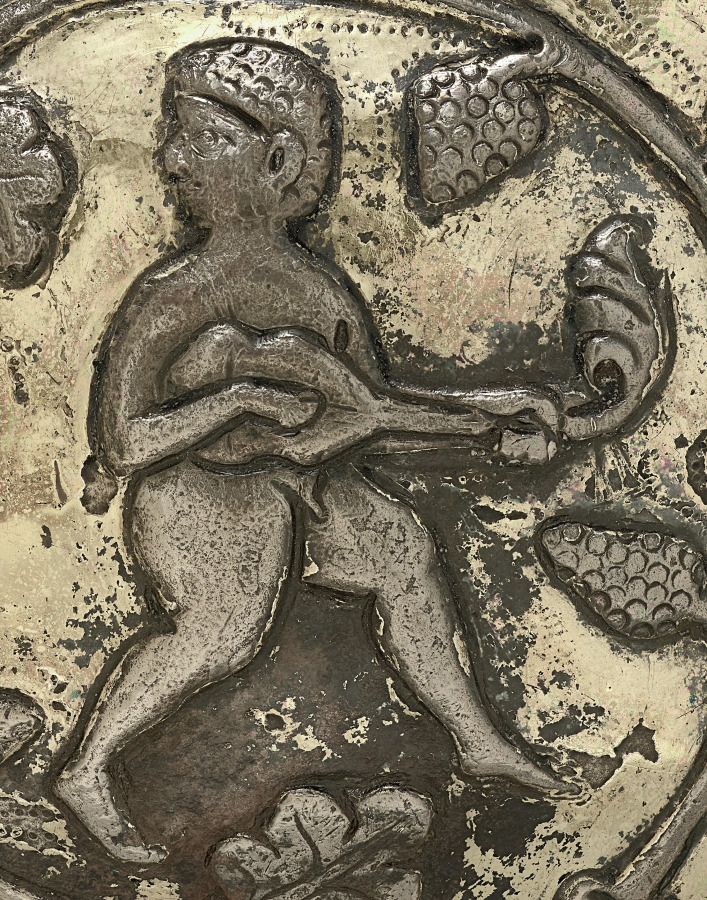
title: Bowl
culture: Iran, Sasanian Empire (224–651 CE)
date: 500–700 CE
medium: silver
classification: Metalwork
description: Every good Zoroastrian was supposed to spend one-third of his day farming; one-third philosophizing; and one-third eating, resting, and at pleasure. The abundance of Sasanian luxury goods is evidence of the importance accorded the last third of the day.